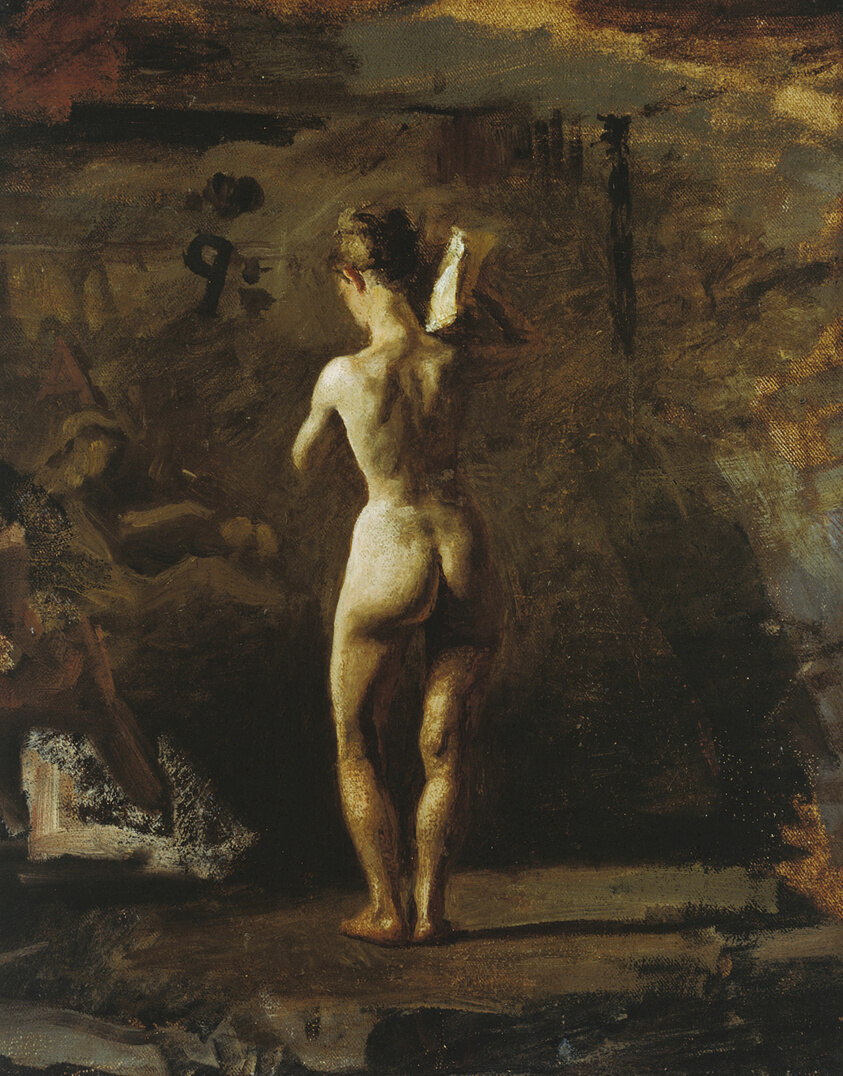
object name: Painting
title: Study for "William Rush Carving His Allegorical Figure of the Schuylkill River"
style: Realism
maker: Thomas Eakins (American, 1844–1916)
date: 1876–77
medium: Oil on canvas mounted on board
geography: United States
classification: painting; american arts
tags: people, portraits